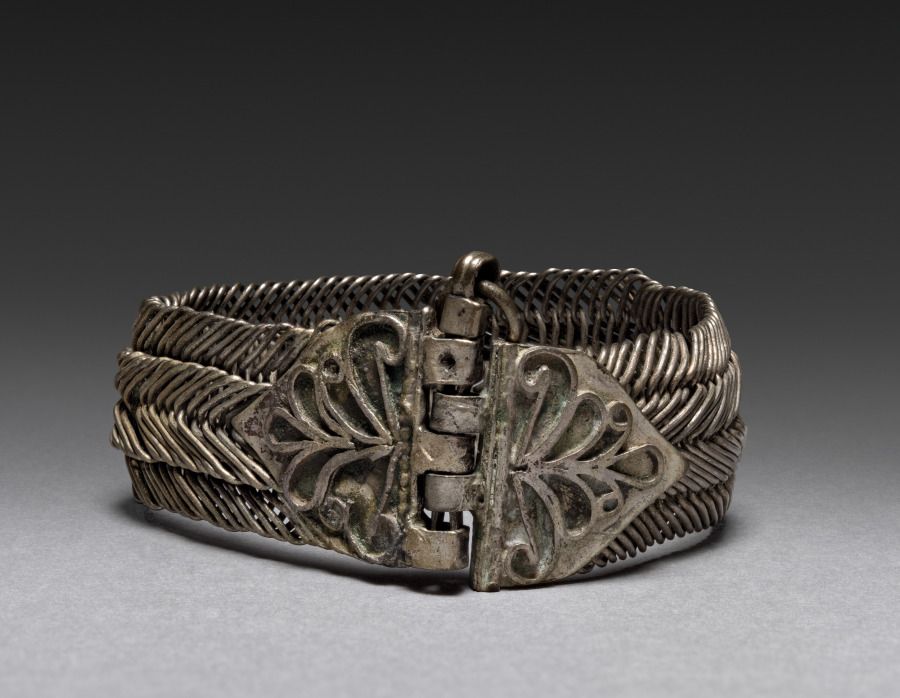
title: Bracelet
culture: Bulgaria, 18th-19th century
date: 1700s-1800s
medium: silver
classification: Jewelry